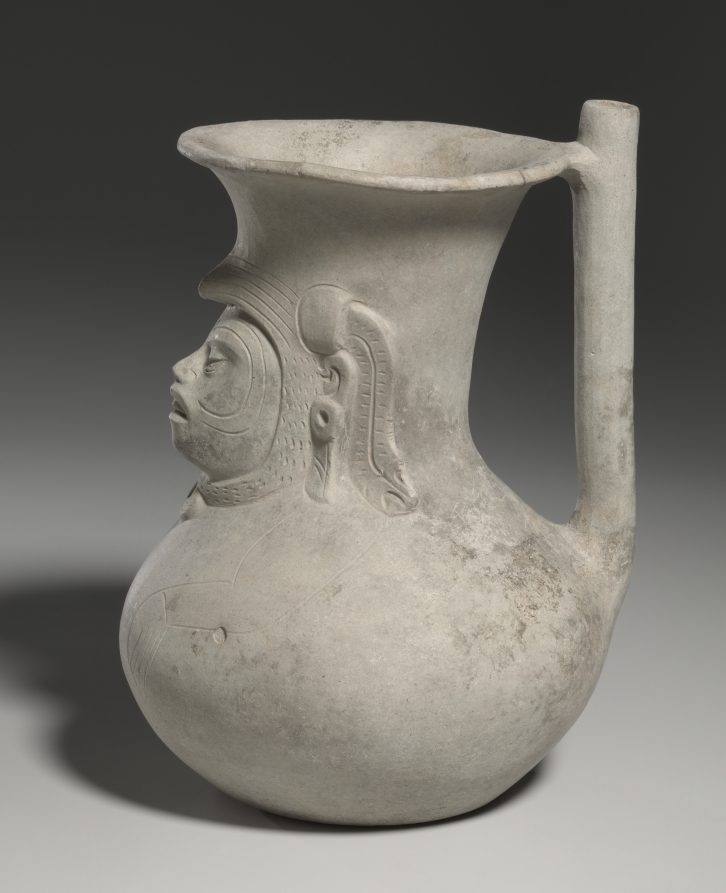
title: Figural Vessel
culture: Mexico, Oaxaca, Zapotec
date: c. 500–150 BCE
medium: earthenware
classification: Sculpture